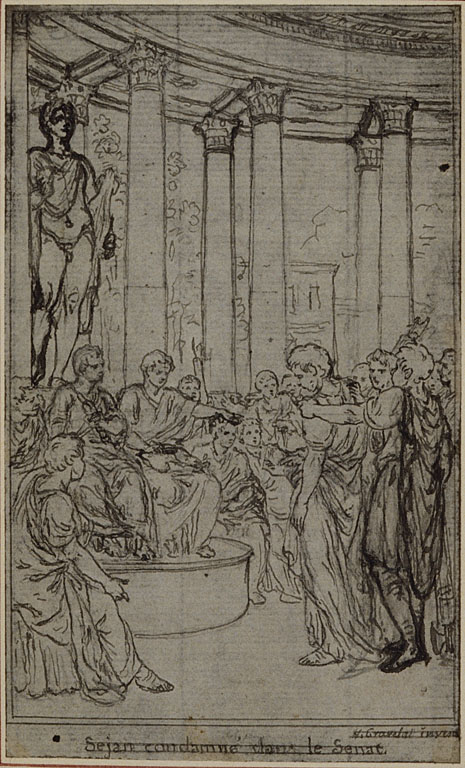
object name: Drawing and Watercolor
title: Study for an illustration in Tacitus "Tibère, ou Les Six Premiers Livres des Annales", Book V, Vol. 3, 2nd Study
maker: Hubert François Gravelot (French, 1699-1773)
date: c. 1768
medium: Pen and black ink, over graphite, on gray laid paper, incised for transfer and perimeter mounted on ivory laid paper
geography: France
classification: pen and ink drawings; drawings (visual works); prints and drawing